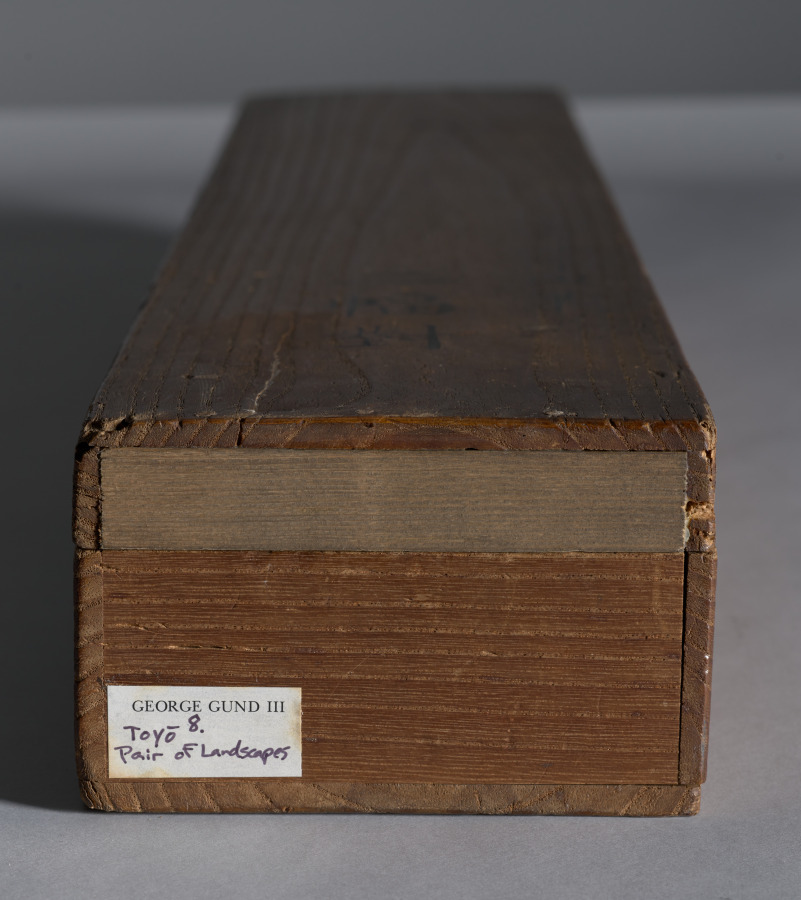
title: Landscapes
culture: Japan, Edo period (1615–1868)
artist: Unkoku Tōyo (Japanese, 1612–1688?)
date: mid- to late 1600s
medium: pair of hanging scrolls; ink and light color on paper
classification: Painting